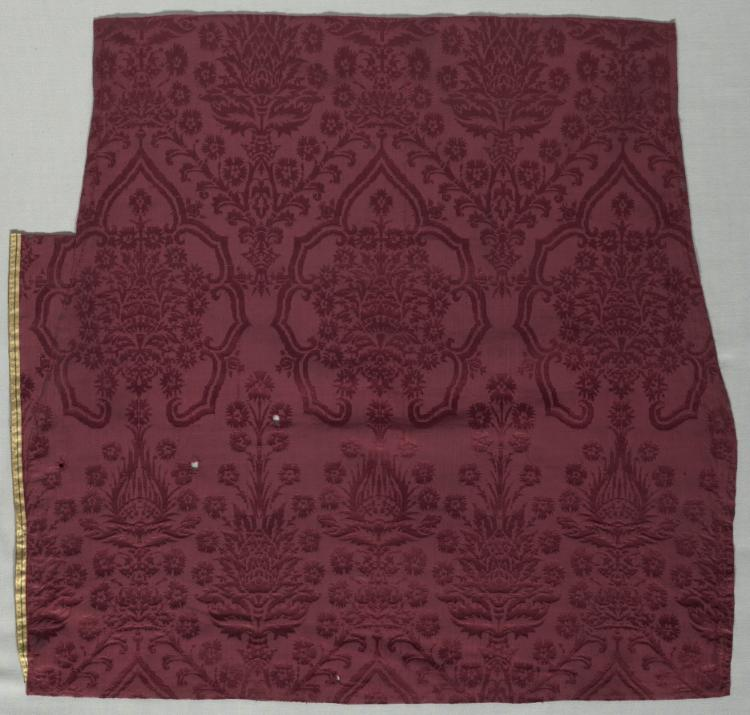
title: Length of Silk Textile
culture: Italy, 15th century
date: 1400s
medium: damask, silk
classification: Textile